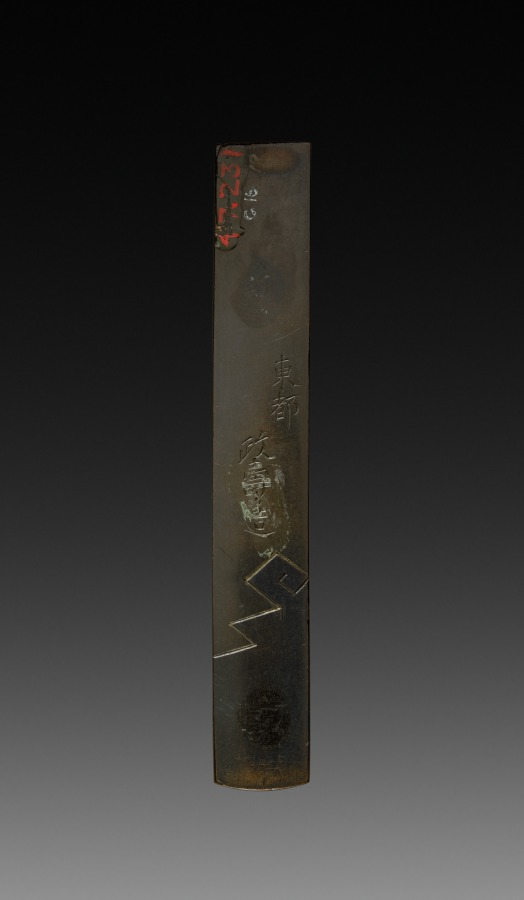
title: Knife Handle (Kozuka)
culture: Japan, Edo period (1615–1868)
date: c 1800s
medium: inlaid bronze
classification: Metalwork